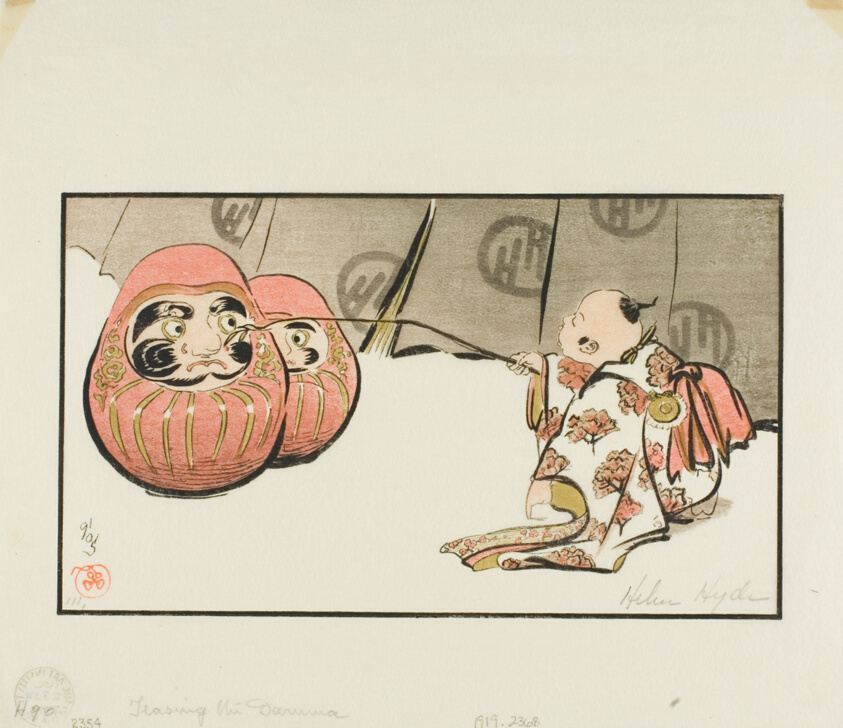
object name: Print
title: Teasing the Daruma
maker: Helen Hyde (American, 1868-1919)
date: 1905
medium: Color woodcut on ivory Japanese paper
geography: United States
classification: woodcut; print; prints and drawing